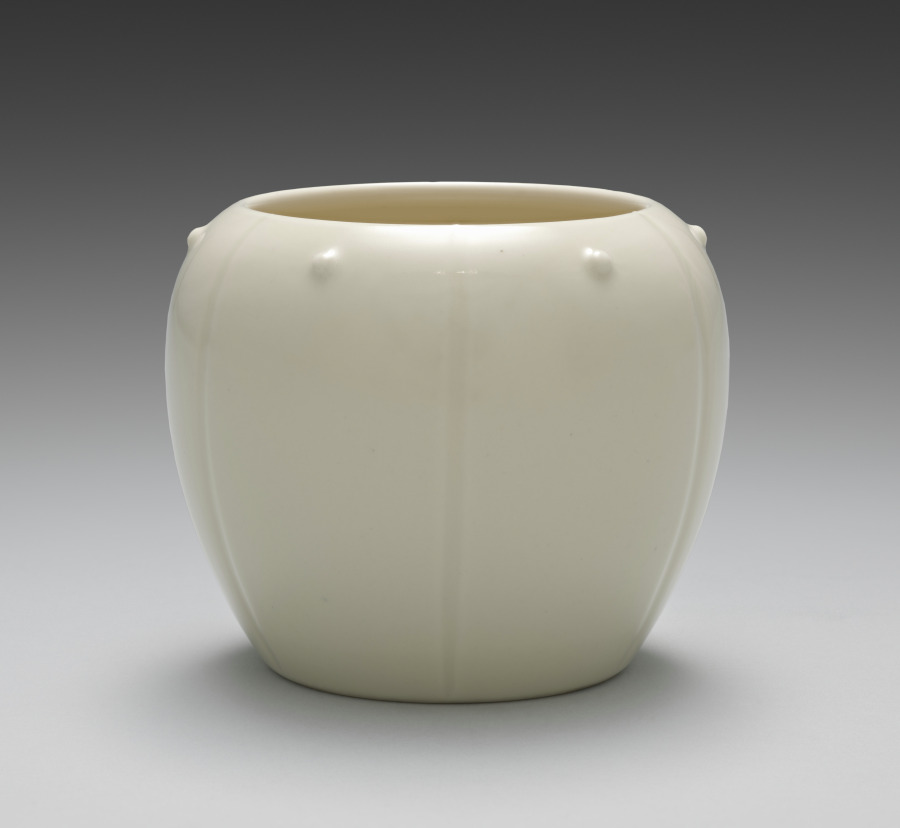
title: Container from Lit Charcoal and Ash Containers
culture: Japan, Meiji period (1868–1912)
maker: Seifū Yohei III (Japanese, 1851–1914)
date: 1893–1914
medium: One from a set of four containers; porcelain with molded design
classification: Ceramic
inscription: 清風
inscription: The storage box for this set is inscribed and impressed with seals.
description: The box lid for these six-lobed lit charcoal and ash containers, or hiire, identifies them as kōhakuji, another of Yohei III’s translucent cream colors over ivory clay bodies. One might translate the name as “lustrous pearl[–glazed ivory] porcelain.” A hiire was filled with ash with burnt coals at the center so that embers and tobacco ash could be discarded safely during a gathering. Each of the lobes on the containers has a round protrusion set below the rim. The studlike pattern is called ruiza. The term is also used to describe the pattern that rings the shoulder of some flower vases or metal kettles used in chanoyu.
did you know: The Seifu studio generally followed the standard practice in Japan for identifying the artist and object in box inscriptions.